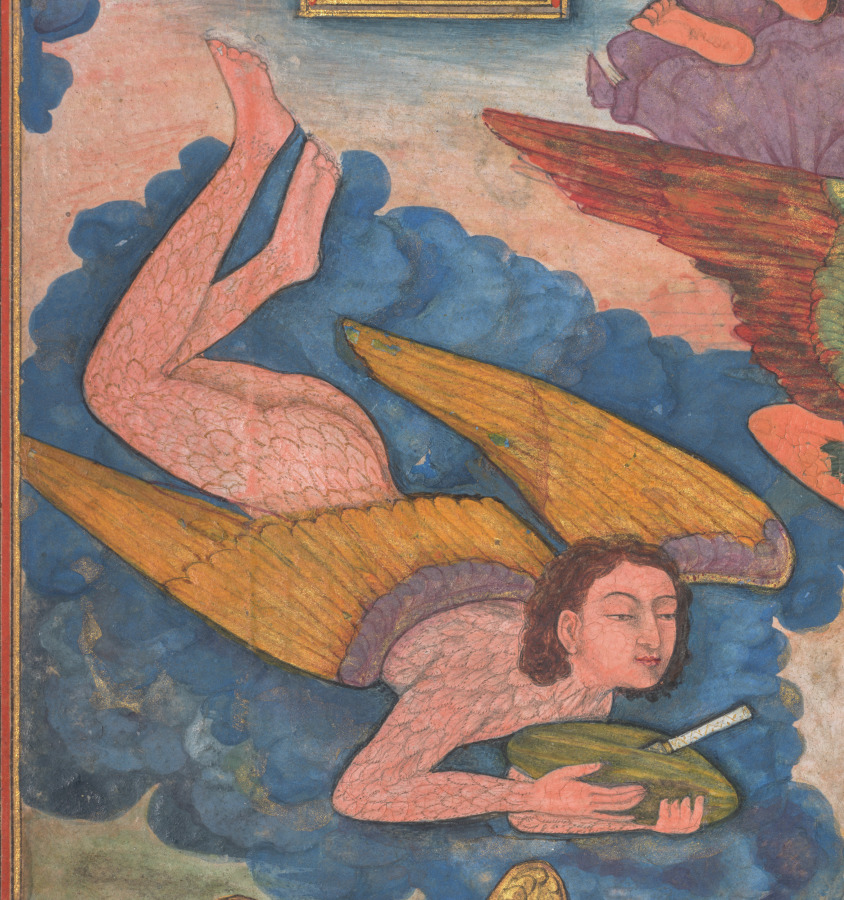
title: Angels bring food to Jesus in the wilderness (folio 55 recto), from a Mirror of Holiness (Mir’at al-quds) of Father Jerome Xavier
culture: Mughal India, Allahabad, made for Prince Salim (1569–1627)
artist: Muhammad Sharif (Indian, active c. 1600)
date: 1602–4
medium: Gum tempera, ink, color, and gold on paper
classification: Manuscript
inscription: Signature of the artist, Muhammad Sharif (Indian, active c. 1600), is written in the tiny pot by Jesus's foot.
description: To end his 40-day fast, five angels brought Jesus refreshments from heaven: breads, melons each with a knife for convenient cutting, fresh leeks, and what appear to be fragrant rice dishes and curries, along with cups of wine. Four of the angels are dressed in robes, and one is clothed only in feathers. After his baptism, Jesus spent 40 days and nights in the desert where he fasted, practiced spiritual exercises, and successfully resisted the temptations of Satan. Many of the rocks in this painting have faces, called grotesques. This page is the only surviving folio from this manuscript that has an artist’s signature, written in the tiny pot by Jesus’s foot.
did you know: The artist has put faces in the rocks, following a Persian convention.